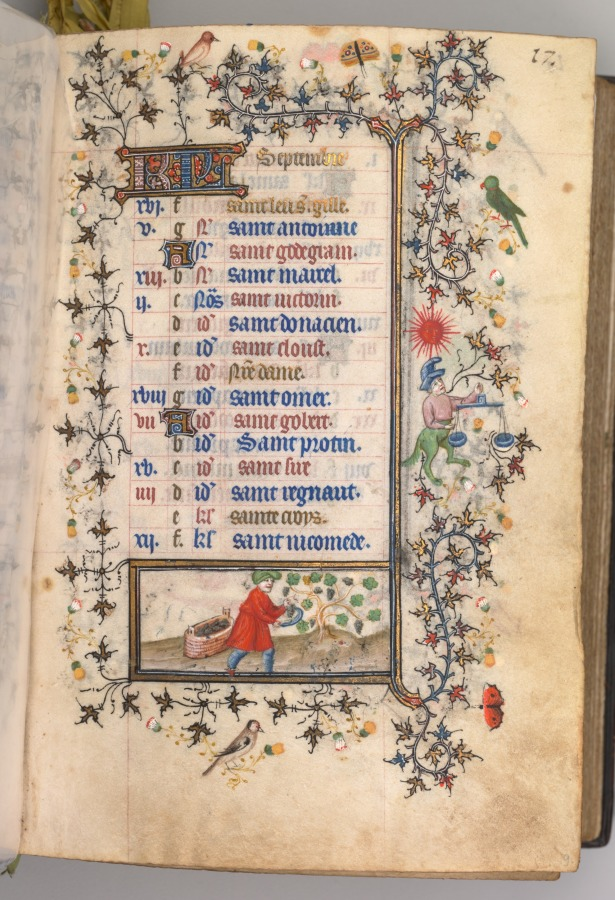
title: Hours of Charles the Noble, King of Navarre (1361-1425): fol. 9r, September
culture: France, Paris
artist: Master of the Brussels Initials and Associates (French)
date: c. 1405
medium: ink, tempera, and gold on vellum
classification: Bound Volume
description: This precious book was highly prized by its owner, Charles III, King of Navarre, a French-born prince whose coat of arms is painted on 20 folios. Charles visited Paris on numerous occasions and likely acquired this volume there in 1404. Paris was the center of the European book trade at the time and attracted illuminators from many parts of Europe. This manuscript represents one of the most remarkable fusions of French and Italian taste in book illumination. Though conforming to Parisian standards, most of the book’s major miniatures are the work of the Brussels Initials Master, an Italian illuminator who previously worked in Bologna and Padua.